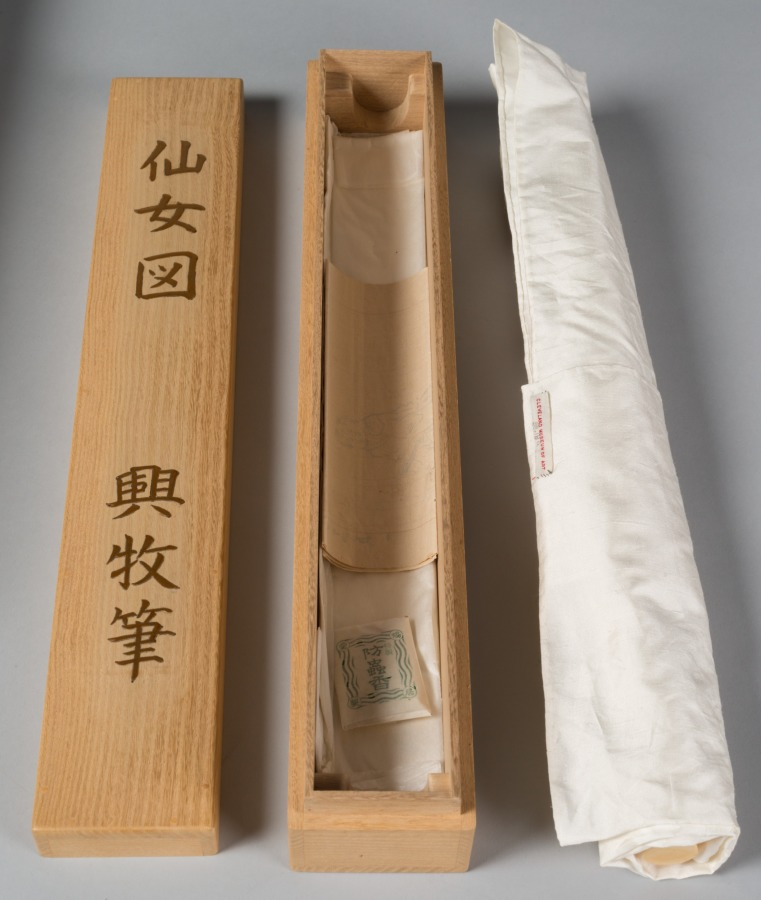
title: Female Daoist Figure in Landscape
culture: Japan, Muromachi period (1392–1573)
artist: Kōboku (Japanese)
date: early 1500s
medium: hanging scroll; ink on paper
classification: Painting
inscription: 「興牧」（朱文方印）